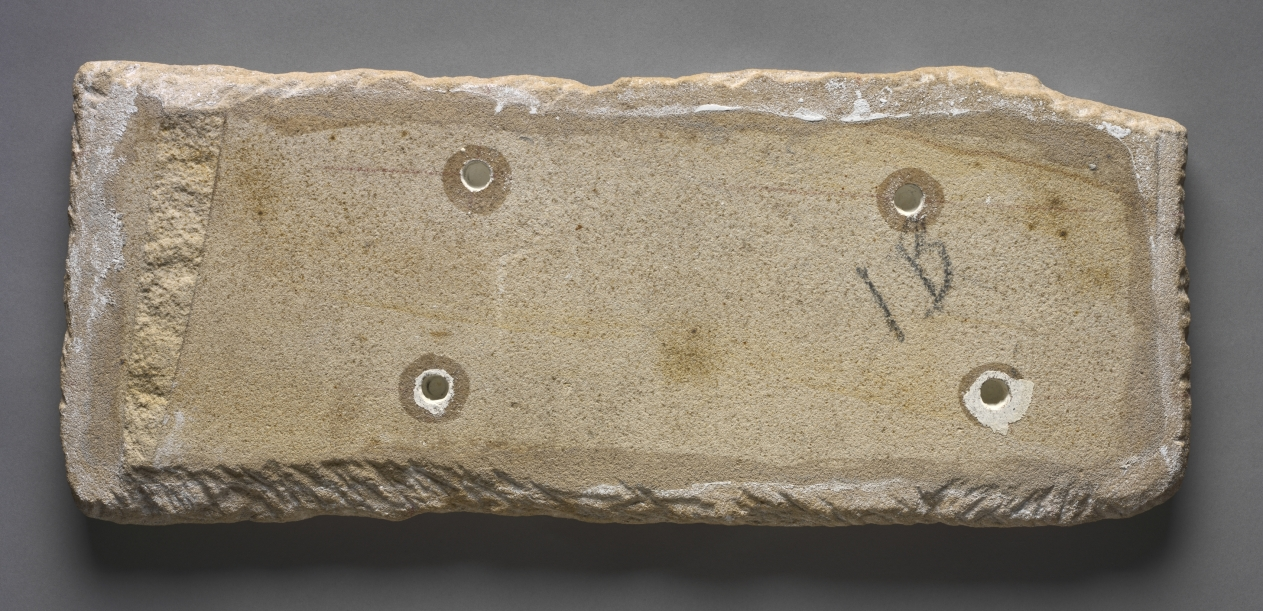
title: Talatat: Men Hoeing the Earth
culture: Egypt, Karnak, New Kingdom (1540–1069 BCE), Dynasty 18, reign of Akhenaten (1351–1334 BCE)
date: c. 1353–1347 BCE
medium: painted sandstone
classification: Sculpture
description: In the early part of his reign, Amenhotep IV built an enormous temple to the sun disk (Aten) at the east end of the temple of Karnak. To expedite construction, sandstone was quarried in small, regularly sized, easily manageable blocks called talatat. Unlike the huge monoliths typically used in temple construction, talatat could be carried and moved into position by one man. Not all of the temple was built of stone, however. In this block, workmen are shown bent in toil. They once formed part of a panoramic scene depicting the production of mud bricks. The men are involved in the initial stages of this process: hacking up the earth and gathering the raw clay. It is very likely that this talatat represents a distinct historical event, undoubtedly connected with Amenhotep IV’s huge building enterprises at East Karnak.